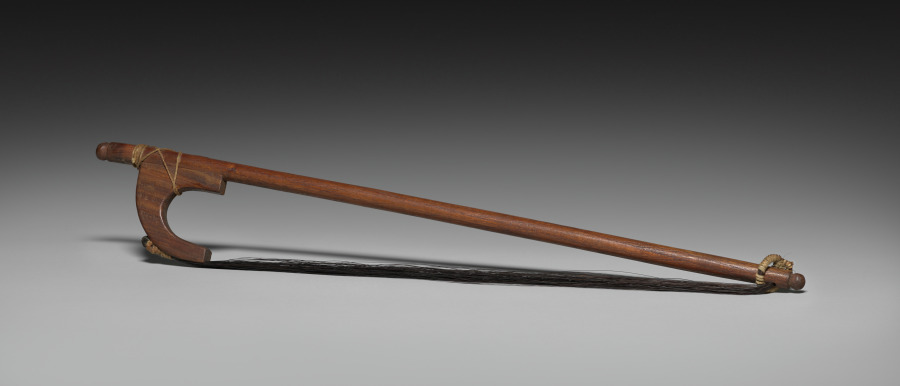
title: Bow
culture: India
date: 1800s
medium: Wood, horsehair, and jute fiber cord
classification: Musical Instrument